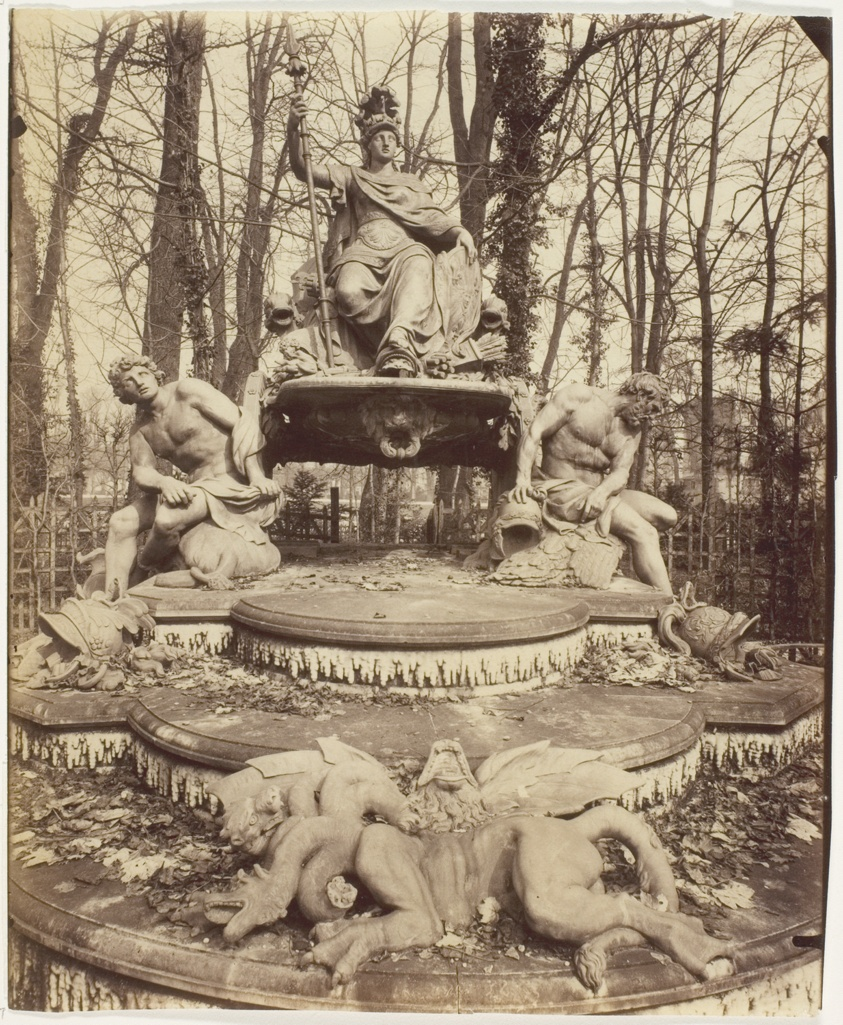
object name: Photograph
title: Versailles, Bosquet de l'Arc de Triomphe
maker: Jean-Eugène-Auguste Atget (French, 1857–1927)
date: 1904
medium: Albumen print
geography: France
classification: albumen silver print; photographic process; photography; photograph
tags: Collected by Hugh Edwards